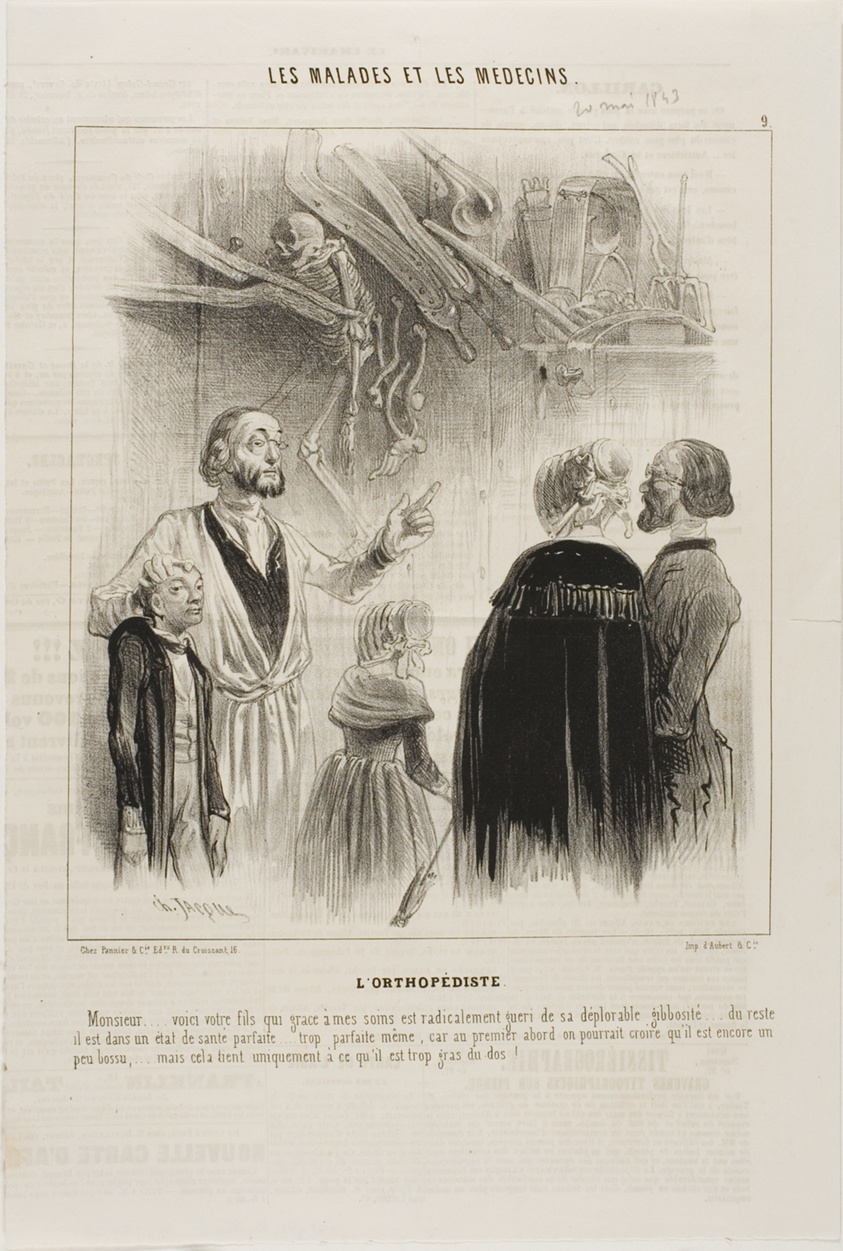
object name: Print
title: The Orthopedist (plate 9)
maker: Charles Émile Jacque (French, 1813-1894)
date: 1843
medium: Lithograph in black on ivory wove paper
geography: France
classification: lithograph; print; prints and drawing